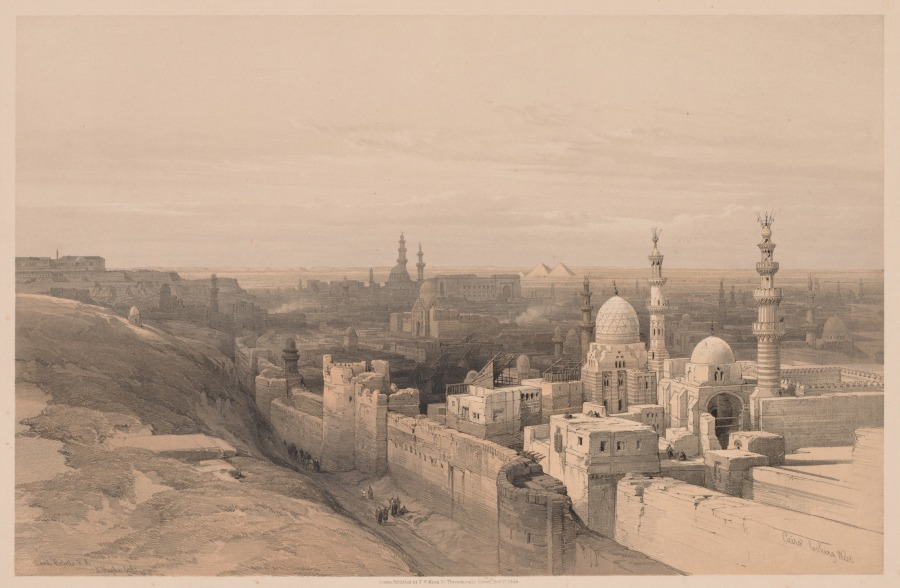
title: Egypt and Nubia, Volume III, No. 26, Cairo, Looking West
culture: England, 19th century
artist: Louis Haghe (British, 1806–1885)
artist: after David Roberts (Scottish, 1796–1864)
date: 1838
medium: color lithograph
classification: Print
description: This printed leaf depicts a panoramic scene of Cairo around the 1800s, viewed from the west. David Roberts was among the earliest British artists to travel to the Middle East in 1838–39, a trip that resulted in more than 250 drawings depicting Egypt and the Holy Land. He later worked with printer Louis Haghe to translate these works into lithography in order to reach a wider audience at a time that coincided with the expansion of European colonialism.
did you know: The Cairo skyline is pierced by minarets, the slender mosque towers from which the Muslim faithful would be called to prayer.